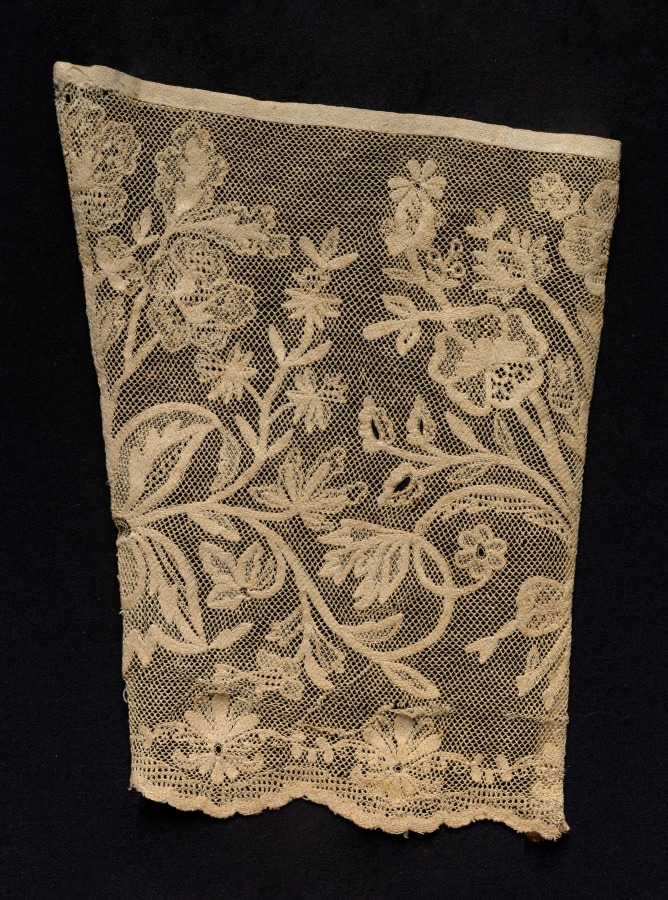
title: Cuff with Floral Vines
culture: Unassigned, 1800s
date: 1800s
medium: Bleached linen (est.): needle lace, filet/lacis (knotted ground and darned in one direction)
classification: Lace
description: In this lace cuff (one of a set, see 1936.226), scrolling vines with budding flowers emerge from a tied bow, creating a stylized bouquet. A scrolling vine with budding vegetation or a tendril motif is a recurring pattern in needle lace. The frequent use of the motif, adapted in lace from different centuries and regions, suggests that it was found in a pattern book.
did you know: From the 15th century, lace cuffs were among the most popular ways to wear and display this costly textile.